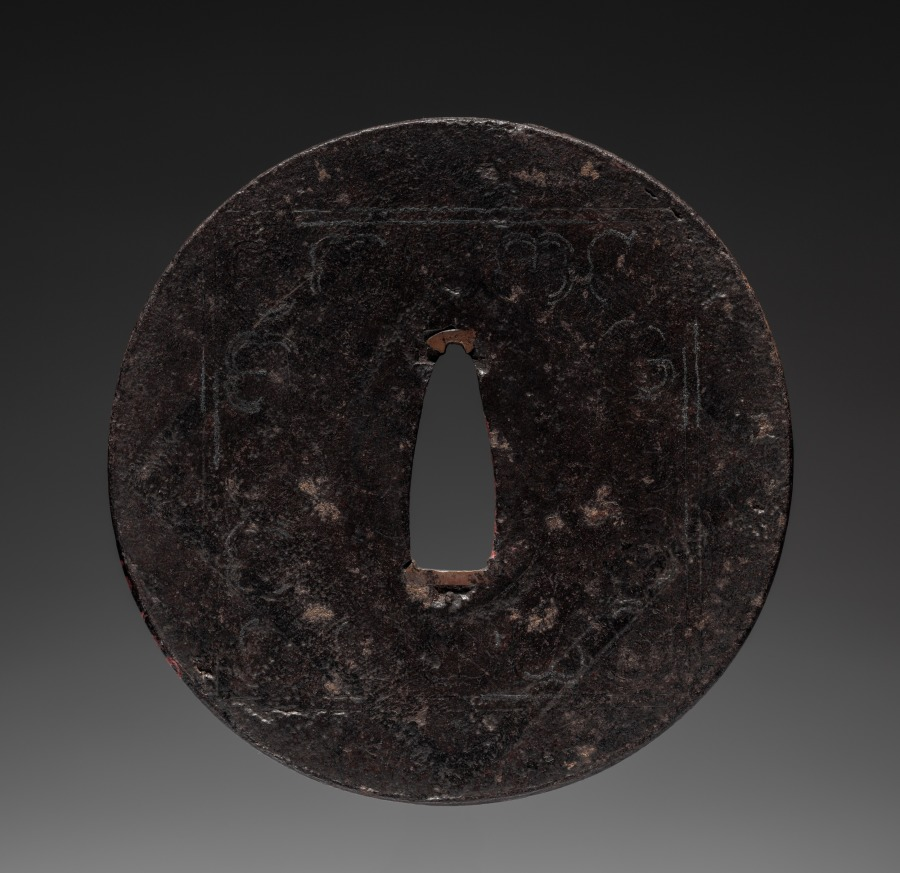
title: Sword Guard (Tsuba)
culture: Japan, possibly Edo period (1615-1868)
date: c. 1615–1868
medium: iron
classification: Arms and Armor